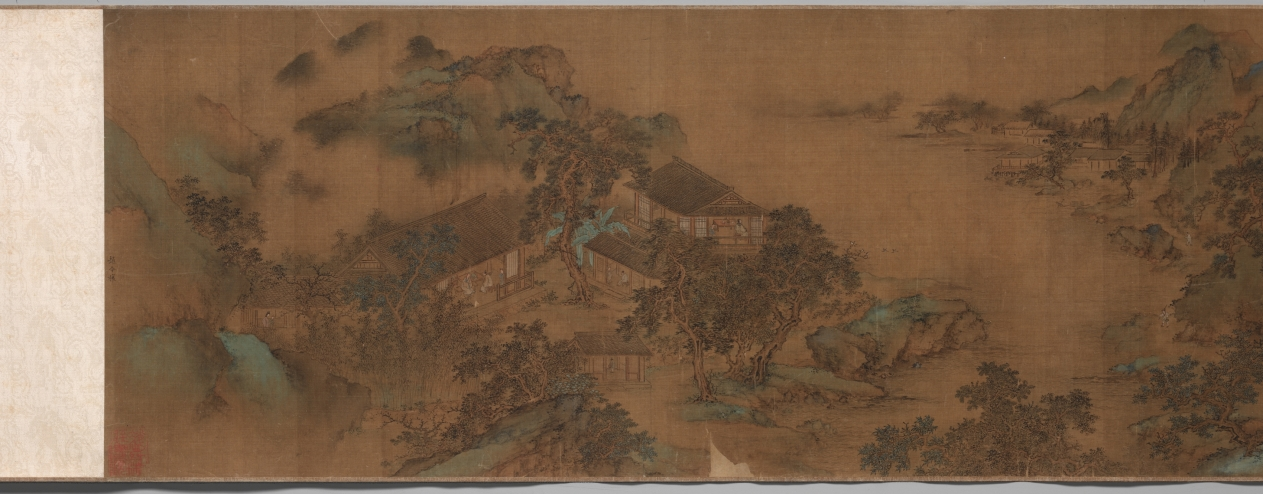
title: Landscape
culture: China, Ming dynasty (1368–1644)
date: 1368– 1644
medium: handscroll; ink and slight color on silk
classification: Painting